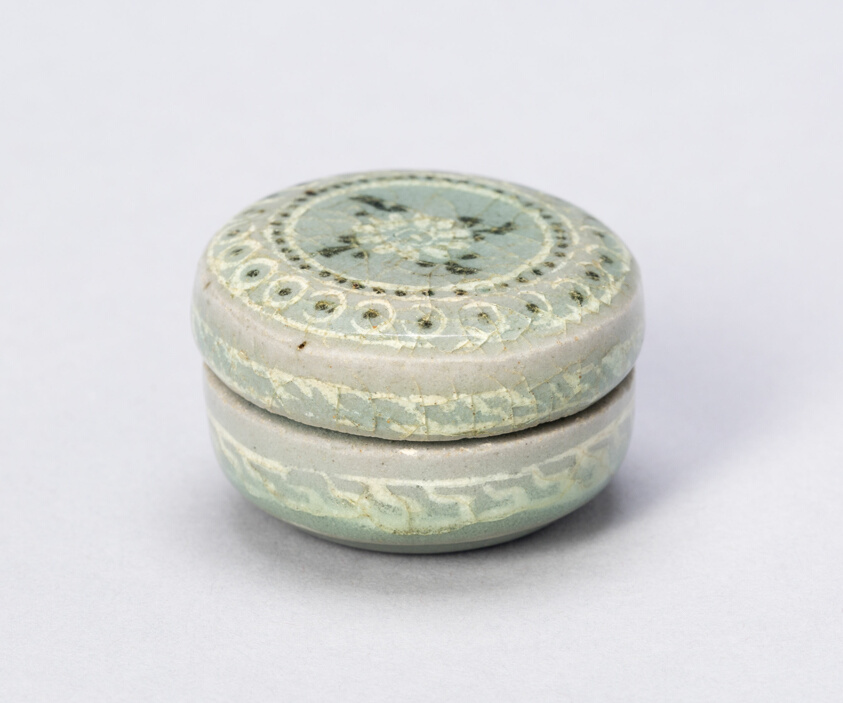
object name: Vessel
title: Covered Cosmetic Boxes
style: Korean (culture or style)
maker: Korea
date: Goryeo dynasty (918–1392), 13th century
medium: Stoneware with red and white slip and celadon glaze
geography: South Korea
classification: vessel